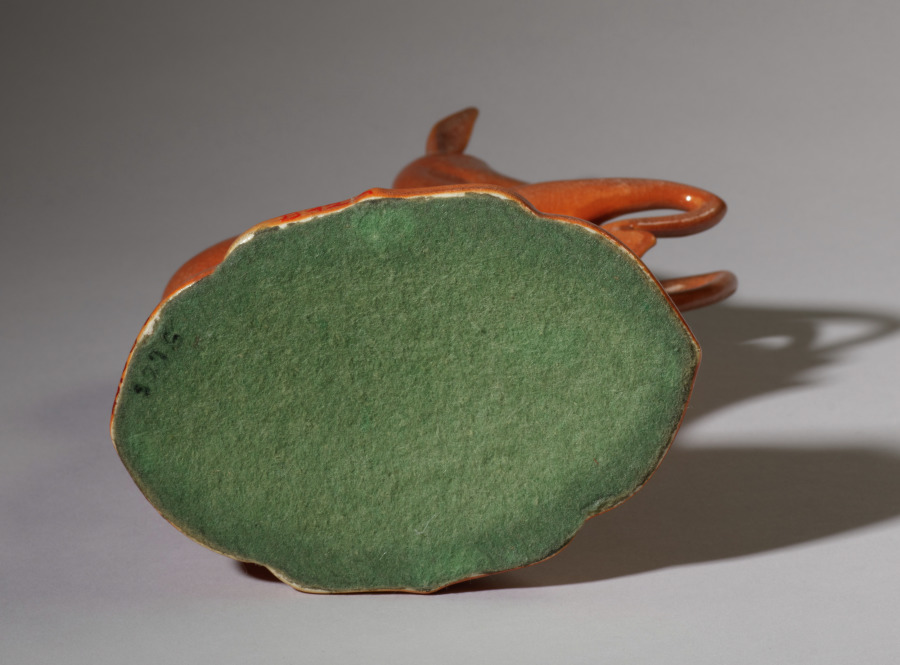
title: Fawn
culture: America, Ohio, Cleveland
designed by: Waylande Gregory (American, 1905–1971)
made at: Cowan Pottery Studio (America, Ohio, Rocky River, 1920–1931)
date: 1929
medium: earthenware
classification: Ceramic